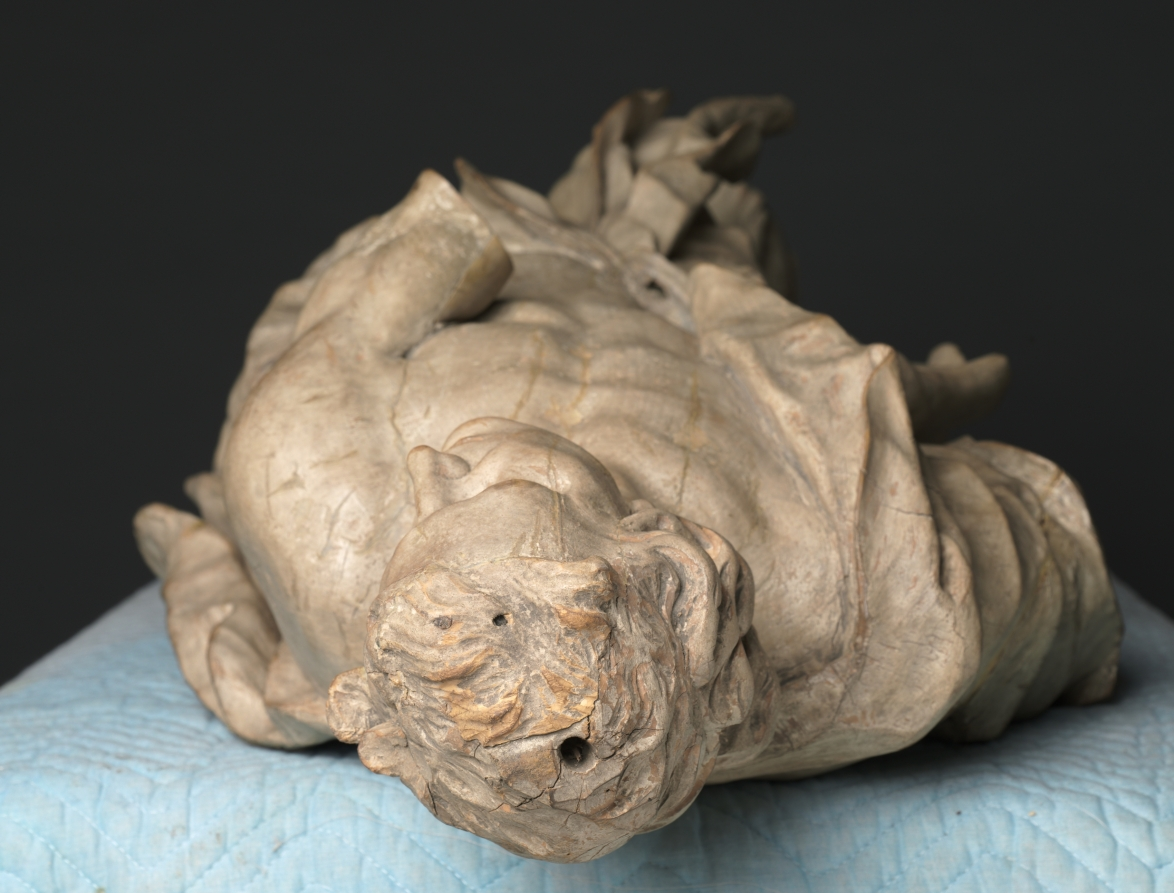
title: A Saint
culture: Germany or Austria, 18th century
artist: follower of Diego Francesco Carlone (Italian, 1674–1750)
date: c. 1730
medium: wood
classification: Sculpture